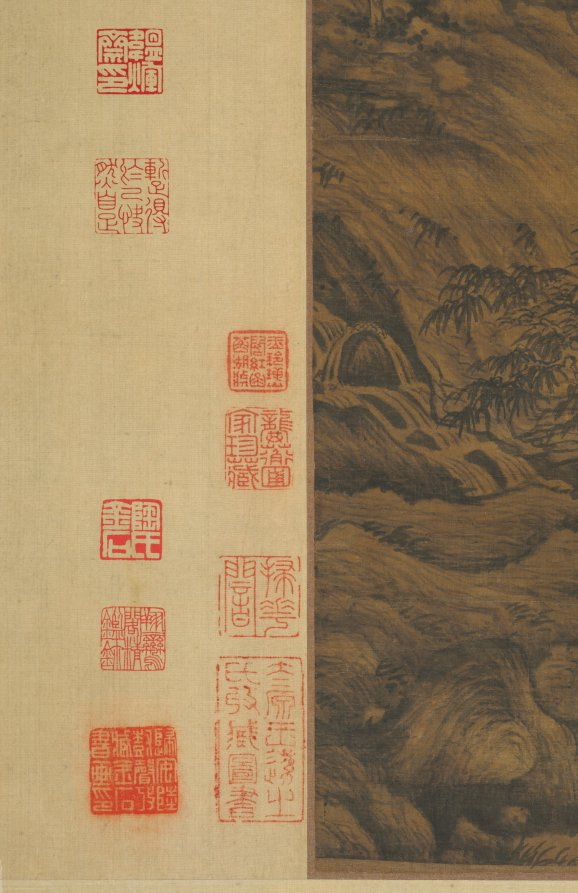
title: The Woodcutter of Luofu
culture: China, Yuan dynasty (1271-1368)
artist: Chen Ruyan (Chinese, c. 1331–1371)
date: 1366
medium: Hanging scroll; ink on silk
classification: Painting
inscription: 至正二十六年（1366）正月望後廬山汝言為思齊斷事寫羅浮山樵圖。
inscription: 2 colophons and 18 additional seals: 5 seals of Wang Shimin 王時敏 (1592–1680); 2 seals of Gong Xianglin 龔翔麟 (1658–1733); 1 colophon, dated 1684, of Yan Shengsun 嚴繩孫 (1623–1702); 1 colophon and 1 seal of Huang Ren (1683–1768); 2 seals of Lu Shusheng 陸樹聲 (3rd son of Lu Xinyuan 陸心源); 2 seals of T'ao Kuang; 1 seal of Tan Jing 譚敬 (20th c.); 3 seals of Zhang Heng 張珩 (1915–1963); 2 seals unidentified.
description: This landscape illustrates the traditionalism of Chinese painting: while the brush manner is novel, the composition is based on early Song dynasty (960-1127) models. The soft raveling brushstrokes and lumpy rock shapes are characteristic of the new 14th-century stylistic expression.